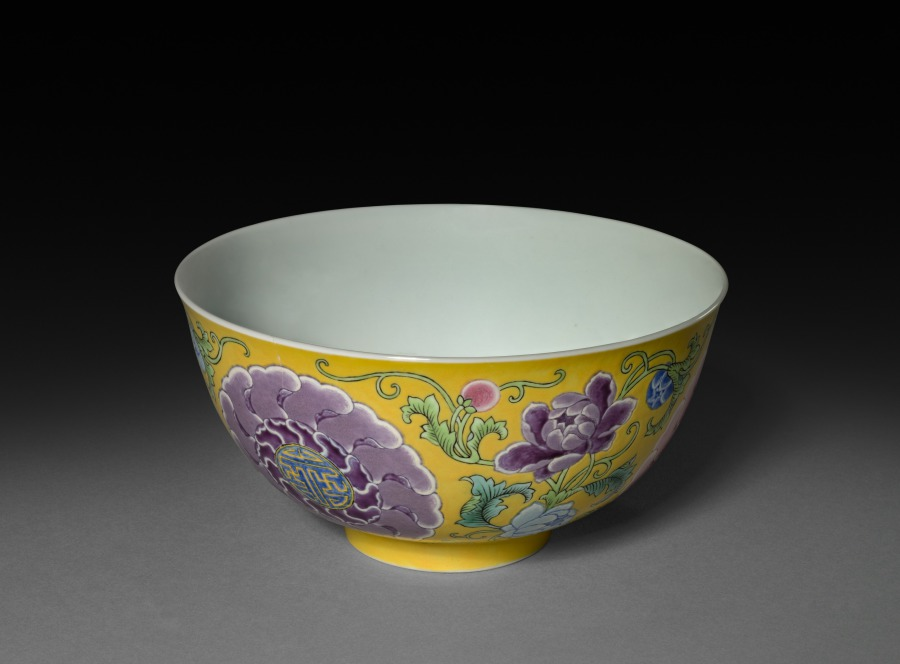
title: Bowl with Floral Sprays and Inscribed Medallions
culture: China, Jiangxi Province, Jingdezhen kilns, Qing dynasty (1644–1911)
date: 1800s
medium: porcelain with famille rose overglaze enamel decoration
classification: Ceramic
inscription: 大清康熙年制